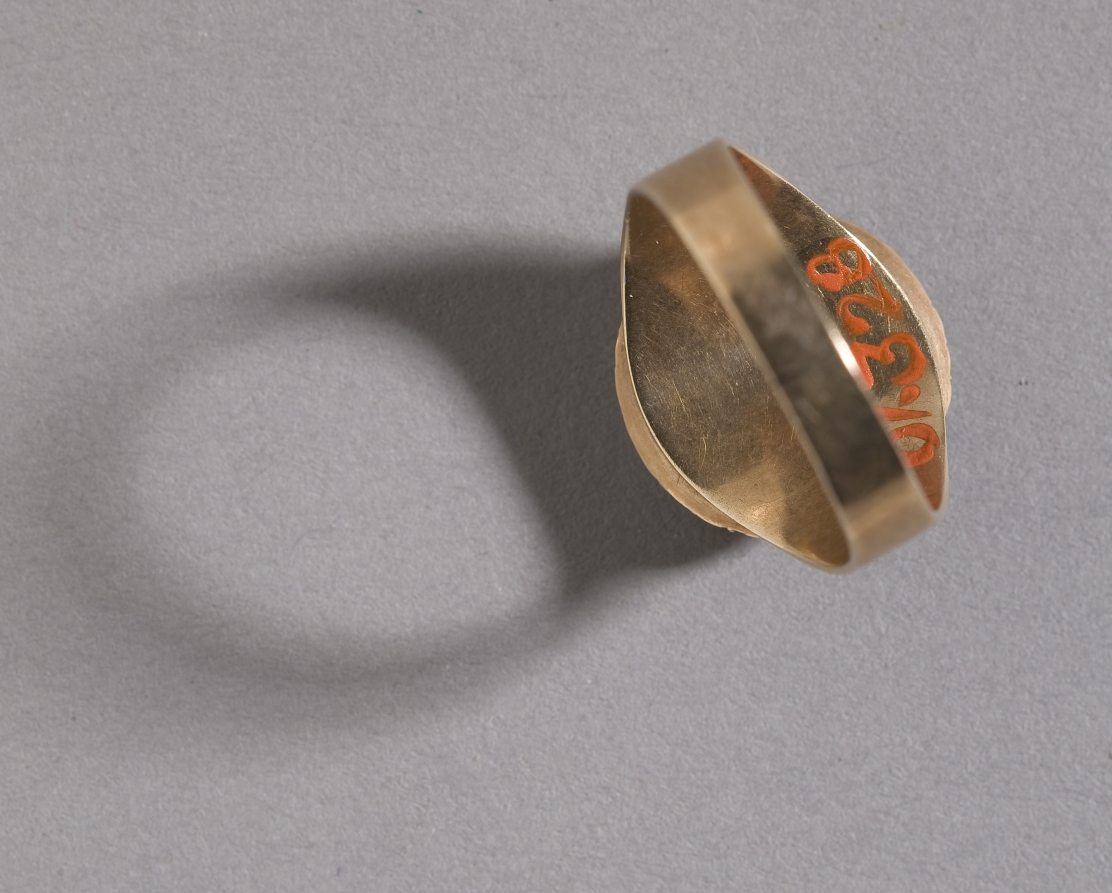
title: Eye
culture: America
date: 1900s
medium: watercolor on ivory set in a ring with split pearl border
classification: Portrait Miniature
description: Eye miniatures were popular in Europe between 1790 and 1830. Only in a few extraordinary cases do we know whose eyes were painted and their limited scope makes it almost impossible to identify the artist, though we know that many famous miniaturists painted eye portraits including John Smart, Richard Cosway, and George Engleheart. Because the artist and the sitter could be known only to the person who commissioned or received the object, these eyes are distinguished from miniatures and portraits for their private significance and insurmountable mystery. There are six eye miniatures in the Cleveland Museum of Art's collection, but this is the only ring. It was probably worn by a woman, but we do not know if the eye belonged to a male or female. Eye miniatures are often set in highly elaborate jeweled frames that balance their simplicity and emphasize their preciousness. The pearls, with a spherical luster that recalls tears, suggest that this was a mourning ring—expressing grief for a lost loved one. Pearls were not cultured until the 1900s, and were highly valued during the 1800s when this was probably painted, making the ring both sentimental and valuable to its owner. In 2000 three of the CMA's eye miniatures appeared in an exhibition on Alfred Hitchcock and art, highlighting their eerie fascination for modern viewers and their relationship to Surrealism and issues of surveillance.